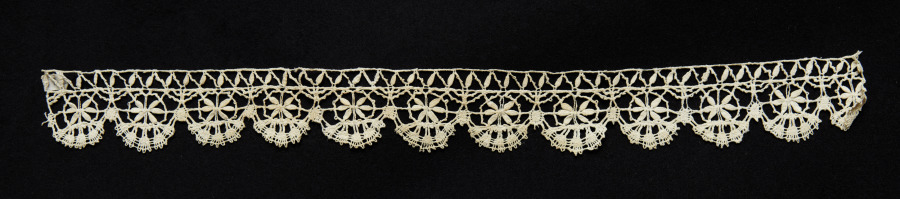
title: Lace Edging with Bell Points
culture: Italy, Genoa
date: 1600s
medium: Bobbin lace (needle lace, reticella design)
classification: Lace